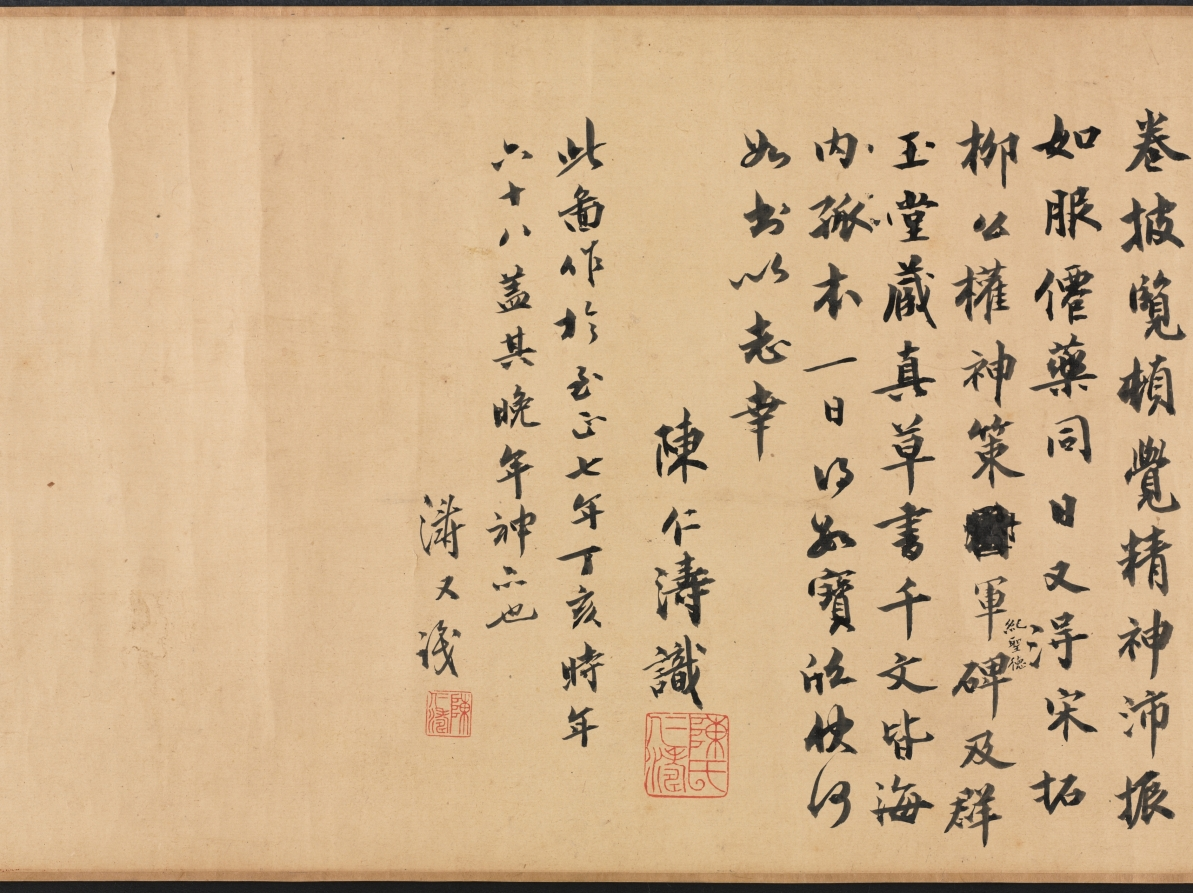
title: Poetic Feeling in a Thatched Pavilion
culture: China, Yuan dynasty (1271-1368)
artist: Wu Zhen (Chinese, 1280–1354)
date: 1347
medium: handscroll; ink on paper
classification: Painting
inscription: 依村構草亭，端方意匠宏。 林深禽鳥樂，塵遠竹松輕。 泉石俱延賞，琴書悅性情。 何當謝凡近，任適慰平生。 至正七年丁亥冬十月，為元澤戲作草亭詩意。梅沙彌書 [印]楳華盦; 嘉興吳鎮仲圭書畫記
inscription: 我愛梅花翁，巨老傳心印。 脩此水墨缘，種種得蒼潤。 樹石墮筆鋒，造化不能吝。 而今橡林下，我願執掃汛。 後學沈周 [印]启南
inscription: Colophon by Chen Rentao (1952): 予求梅道人畫二十年不可得。所見多膺鼎，即故宮所藏山水數軸都不可靠。傳世真迹，惟《漁父圖》、《嘉禾八景》與此《草亭詩意》而已。壬辰十月十四日余大病初愈，居家休養，研山師忽持此圖相贈。展卷披覽，頓覺精神沛振，如服僊藥。同日又得宋拓柳公權《神策軍紀聖德碑》，及群玉堂藏《真草書千(字)文》，皆海內孤本。一日得數寶，欣喜何如，書以志幸。 陳仁濤識 [印]陳氏仁濤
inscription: Colophon by Chen Rentao: 此圖作於至正七年丁亥，時年六十八，盖其晚年神品也。 濤又識 [印]陳仁濤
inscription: Title on frontispiece by Li Dongyang 李東陽 (1447-1516).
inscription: 33 additional seals: 1 seal of Li Chao-heng 李肇亨 (1592-1664)：檇李李肇亨書畫記; 9 seals of Liang Qingbiao 梁清標 (1620-1691): 蒼巖子、蕉林、蕉林梁氏書畫之印、蕉林秘玩、蕉林書屋、蕉林玉立氏圖書、棠邨 (appears twice)、棠邨審定; 1 seal of Wang Yirong (1845-1900): 懿榮; 3 seal of Li Yanshan (1898-1961): 雙銕笛樓 (appears twice)、硯山心賞; 12 seals of Chen Rentao 陳仁濤（1906-1968）：陳氏仁濤、陳仁濤珍藏印、金匱寶藏·陳氏仁濤 (appears three times)、金匱秘笈、金匱室、金匱室精鑒璽 (appears twice)、金匱室主、金匱神品、仁濤奇緣; 1 seal: 崐溟居士; 1 seal: 林止在㭯生圖書印; 3 seals unidentified.